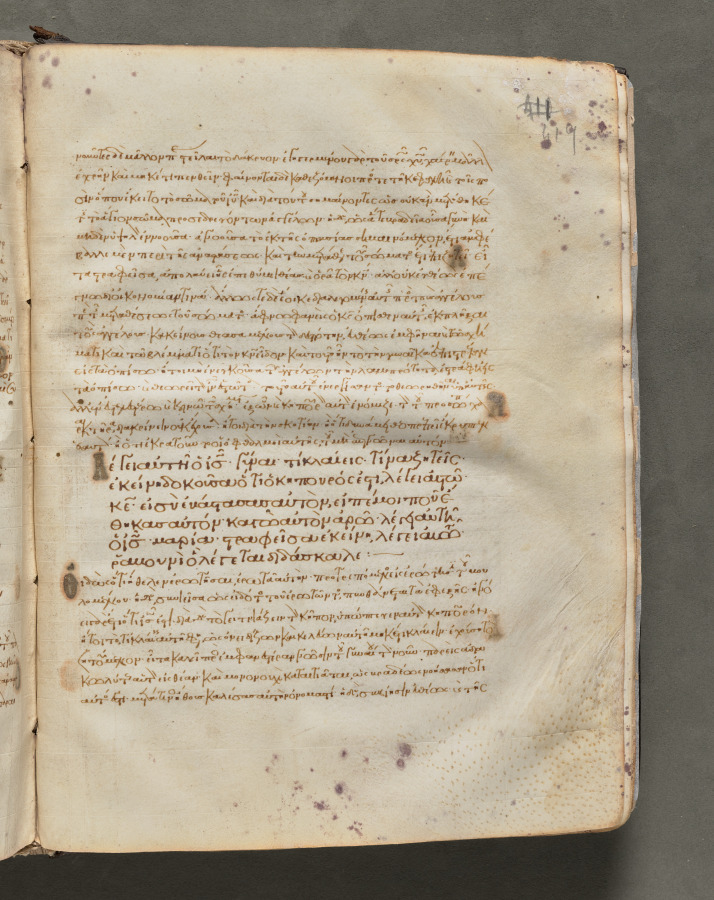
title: Text, folio 419 (recto), from a Gospel Book with Commentaries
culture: Byzantium, Constantinople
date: c. 1000–1100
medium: ink, tempera, and gold on vellum; leather binding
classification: Bound Volume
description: Each of the four gospels in this book opens on a page with brilliantly illuminated borders depicting the author of the text as well as birds—principally peacocks, symbols of the immortality of the soul—and fountains, representing the fountain of life and the salvation of the soul. This volume consists of 428 leaves with texts in Greek. Its level of sophistication suggests that it was probably written and decorated in a monastery in Constantinople.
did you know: Gospel books were carried in procession through Byzantine churches.